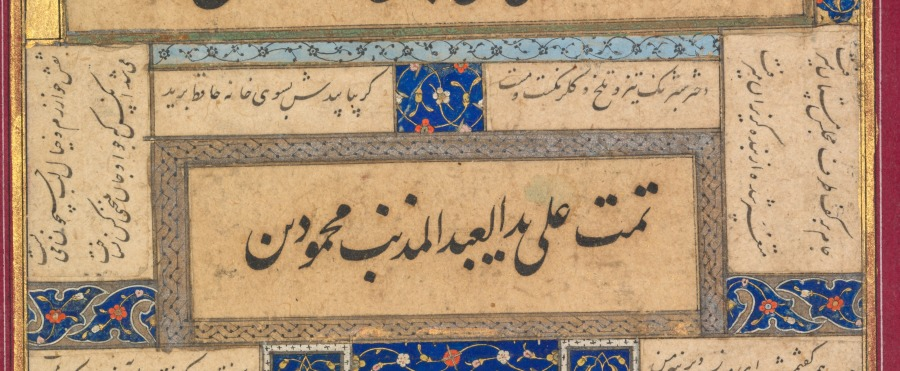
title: Calligraphic exercises and verses of Hafiz (Persian, about 1325–1389) (verso)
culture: Persian, Uzbekistan, Bukhara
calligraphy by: Mahmud ibn Ishaq al-Shahabi (Persian, active mid- to late 1500s)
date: 1575–76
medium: Gum tempera, ink, and gold on paper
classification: Calligraphy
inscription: In center, Persian exercises including on the second line down the “abjad” letters of numeration followed by calligrapher’s signature, in nasta‘liq script: Done by the hand of the sinful slave Mahmud ibn Ishaq al-Shahabi, may God forgive his sins, in the year 982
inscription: Persian verses above from a ghazal of Hafiz (Persian, 1325–1389), in nasta‘liq script: For some days now the Daughter of the Vine has been lost to us,/ Gone away to tend to her own affairs. Be alert and prepared (as a search party)./ Her dress is of rubies and she wears a tiara of delicate glass./ She carries off wisdom and knowledge. Till you feel safe and secure from her, remain alert!/ Whoever will bring her bitter presence to me, I will give him sweet confectionaries (halwa) in exchange,/ And should she be hiding in disguise in the underworld, go down (and seek her out)/ The daughter of the dark-colored (vine) is quick-tempered, petulant, rose-colored and drunk./ Should you find her, take her towards Hafiz’s house.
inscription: Persian verses below, continued from above, in nasta‘liq script: I saw her last night, sauntering and tipsy./ A cup in hand, she was heading towards a gathering of the drunk/ I was so vexed that my poetic powers/ Became distraught and fled away from me/ She was harboring thoughts of Khwarazm and the shores of the Oxus/ With a thousand complaints she was leaving the Kingdom of Solomon/ Gone would be the person who knew the very soul of poetry as no one else./ I was witnessing this and my soul was seeping out of my body/ I protested and much lamented but to no avail/ For this was a matter for the Sultan’s compassion to tend.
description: This fine calligraphic work is signed and dated by a calligrapher who was highly regarded in both Safavid Iran and Mughal India. Mughal albums typically had a painted portrait or figural scene on one side, and a work of calligraphy on the other. The British civil servant Sir Charles Forbes made his album following that format. The verses are a lament over a lack of wine, beginning: For some days now the Daughter of the Vine has been lost to us, Gone away to tend to her own affairs. Be alert and prepared as a search party. Her dress is of rubies, and she wears a tiara of delicate glass.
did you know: The work was part of an album of paintings collected in India before 1811 by a Scottish politician who worked for the British East India Company.